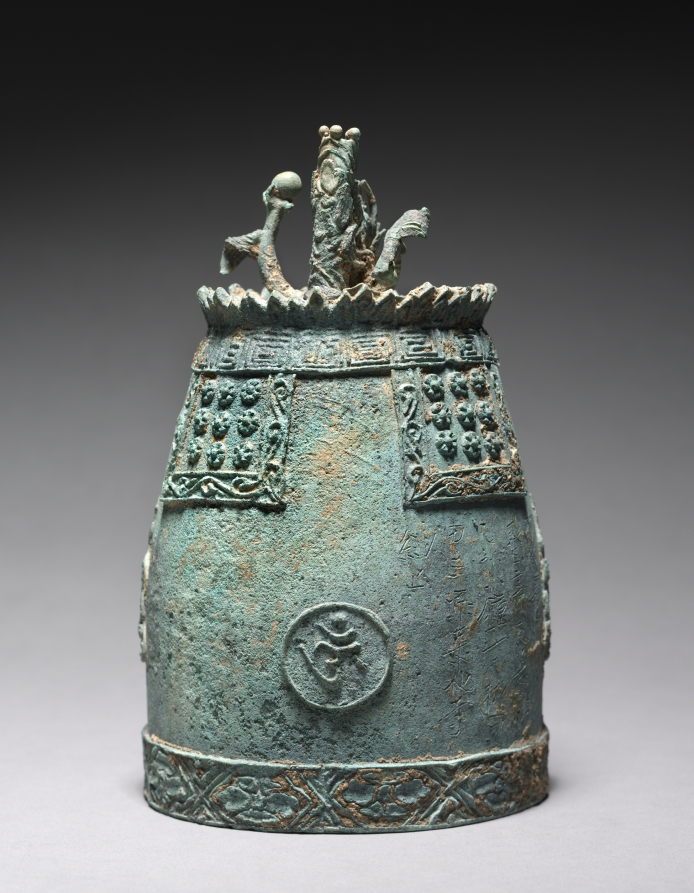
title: Bronze Ritual Bell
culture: Korea, Goryeo dynasty (918–1392)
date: 1226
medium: cast bronze with incised inscription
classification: Metalwork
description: This miniature bell was once used as part of Buddhist indoor rituals. Likely suspended in a Buddhist temple, it features a cast dragon and a vertical tube to amplify the sound on top, and is decorated with Buddhist figures seated on lotuses. The echoing sound of the bell was thought to help Buddhist believers understand the significance of transience and impermanence; the sound instantly fades away as soon as one hears it. This sensory experience creates a striking conceptual parallel with Buddhist teachings, including the idea that all things and beings exist merely in our perception or imagination. An inscription indicates it was cast in the year of the dragon and took three years to make.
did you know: The inscription informs us that this miniature indoor bell was produced in 1226.